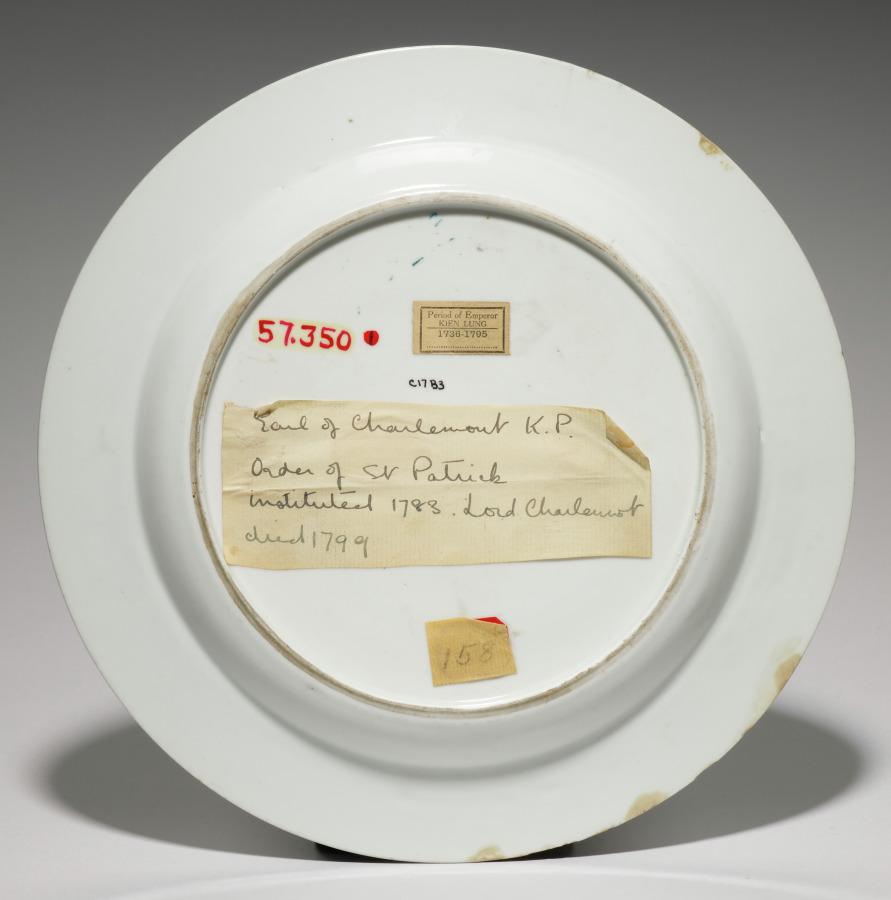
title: Plate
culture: China, Chinese Export, 18th century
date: 1783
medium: underglaze blue porcelain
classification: Ceramic